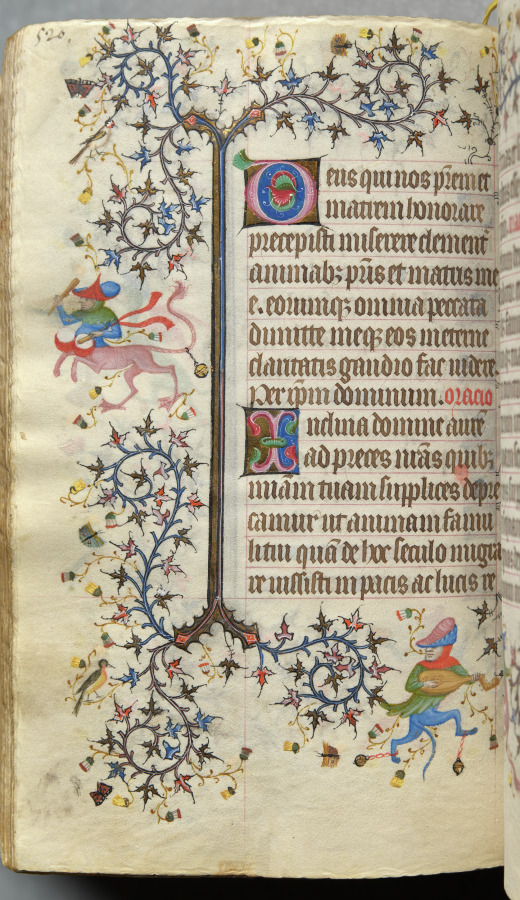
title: Hours of Charles the Noble, King of Navarre (1361-1425): fol. 254v, Text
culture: France, Paris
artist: Master of the Brussels Initials and Associates (French)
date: c. 1405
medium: ink, tempera, and gold on vellum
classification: Bound Volume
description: This precious volume was obviously highly prized by its owner, the French-born King of Navarre, who had his coat of arms painted on no less than twenty folios. Rather than directly commissioning this manuscript from a specific workshop, it seems that Charles the Noble acquired his book of hours -- perhaps ready-made for the luxury market -- while on a trip to Paris in 1404-05. A collaborative effort, six painting styles are evidenced within the pages of this codex, those of two Italians, two Frenchmen, and two Netherlanders. The painter who was responsible for the planning and decoration of the book, and who produced seventeen of the large miniatures, was a Bolognese artist known as the Master of the Brussels Initials. His principal assistant, responsible for most of the borders, was a Florentine who signed his name "Zecho" da Firenze on folio 208 verso.